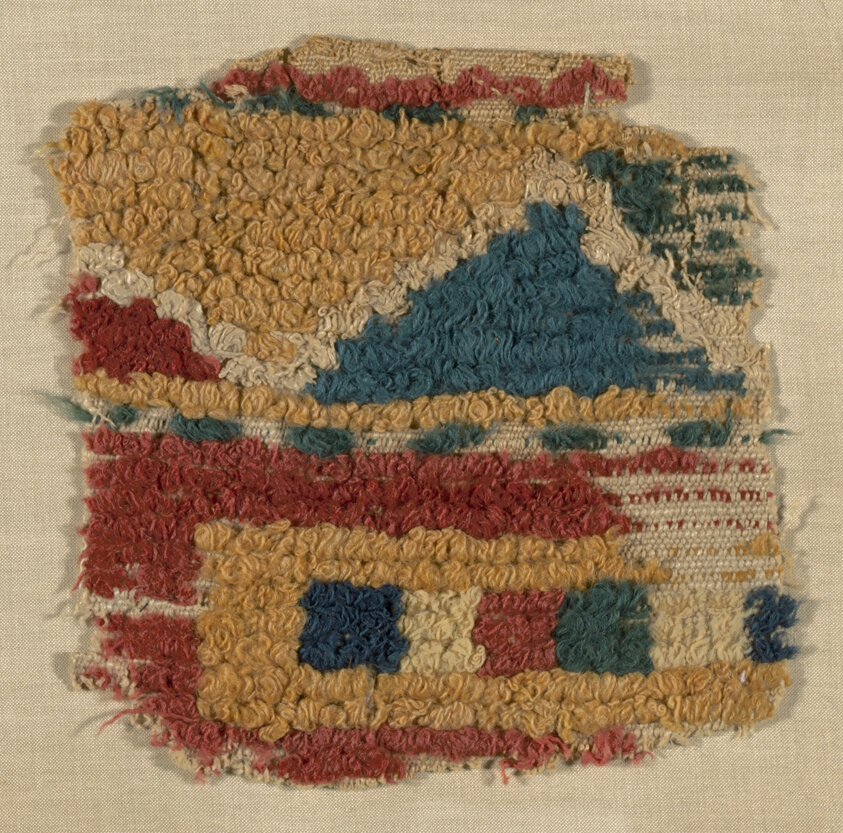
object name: Textile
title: Fragment (from a Large Hanging)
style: roman period (egyptian), greco-roman (egyptian)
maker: Coptic; Egypt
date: Roman period (30 B.C.– 641 A.D.), 5th/6th century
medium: Linen and wool, plain weave; uncut pile weave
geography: Egypt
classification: textile; weaving